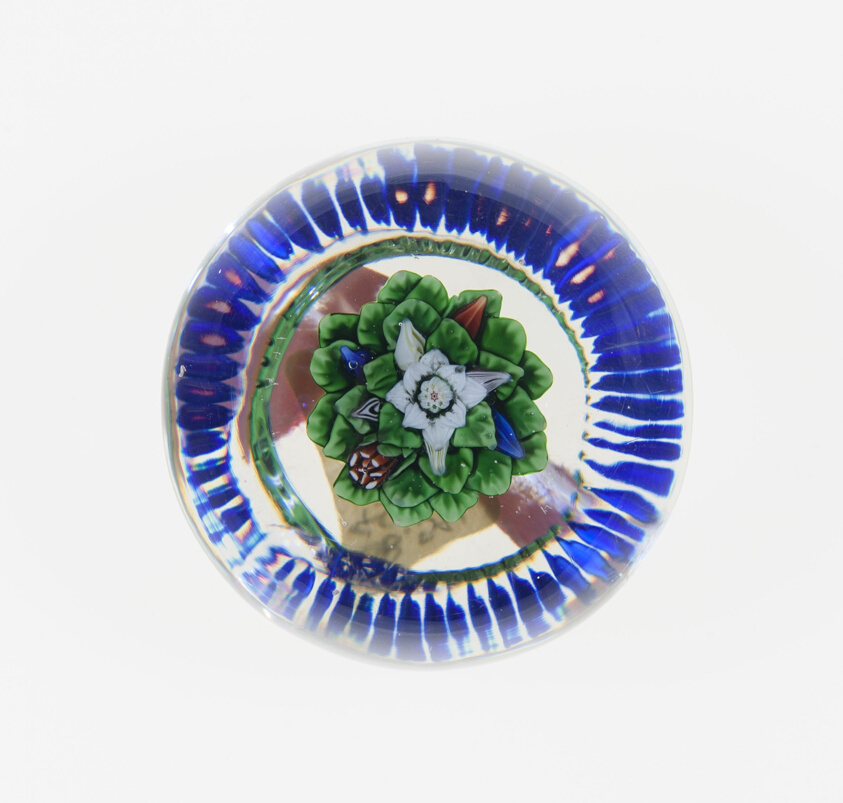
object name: Glass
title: Paperweight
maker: Baccarat Glassworks (Cristalleries de Baccarat); Lorraine, France, founded 1764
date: c. 1845–60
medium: Glass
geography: Baccarat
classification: paperweight; glass